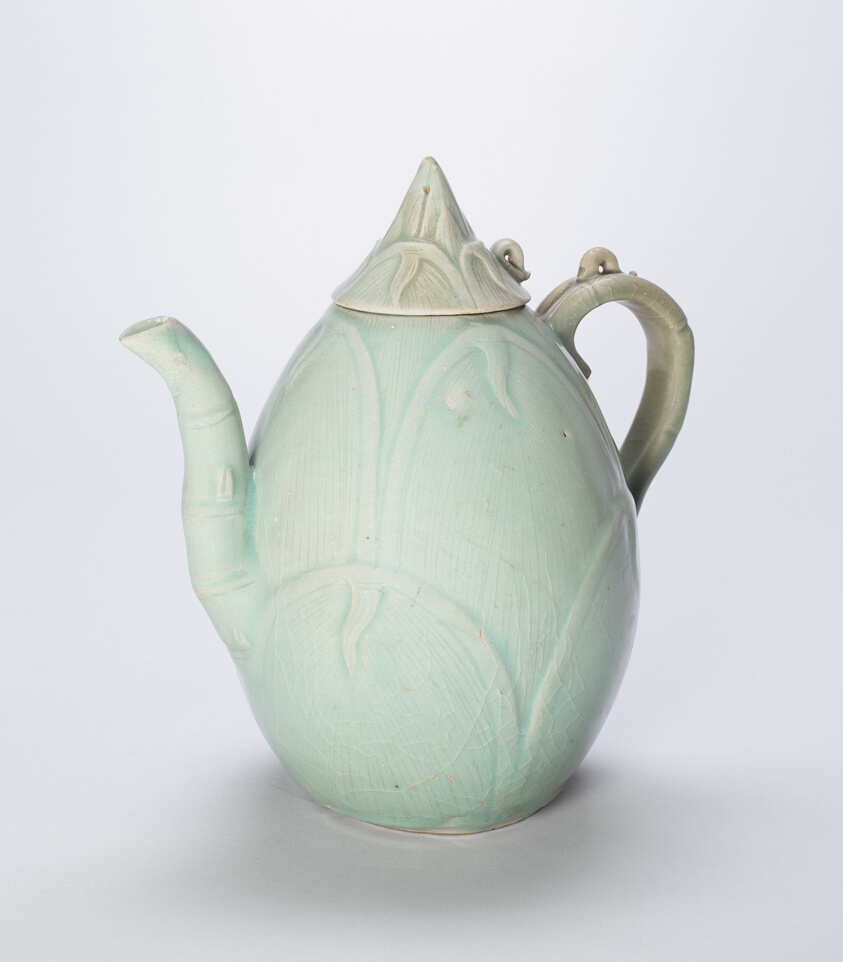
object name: Vessel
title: Ewer in the Form of a Bamboo Shoot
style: Korean (culture or style)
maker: Korea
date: Goryeo dynasty (918–1392), mid–12th century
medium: Celadon-glazed stoneware with underglaze molded decoration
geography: Korea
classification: ewer (vessel); vessel; asian art; ceramics